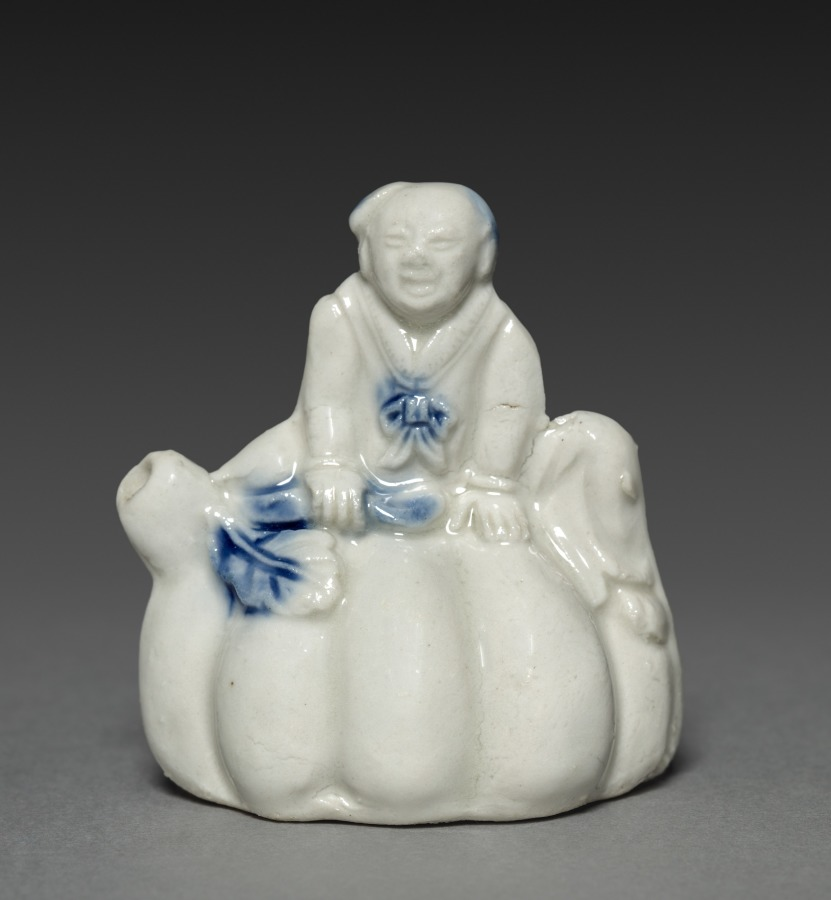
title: Waterdropper in Shape of Chinese Boy Seated on a Gourd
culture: Japan, Edo period (1615–1868)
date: 1700s to mid-1800s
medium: porcelain, molded and carved, with underglaze blue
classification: Ceramic